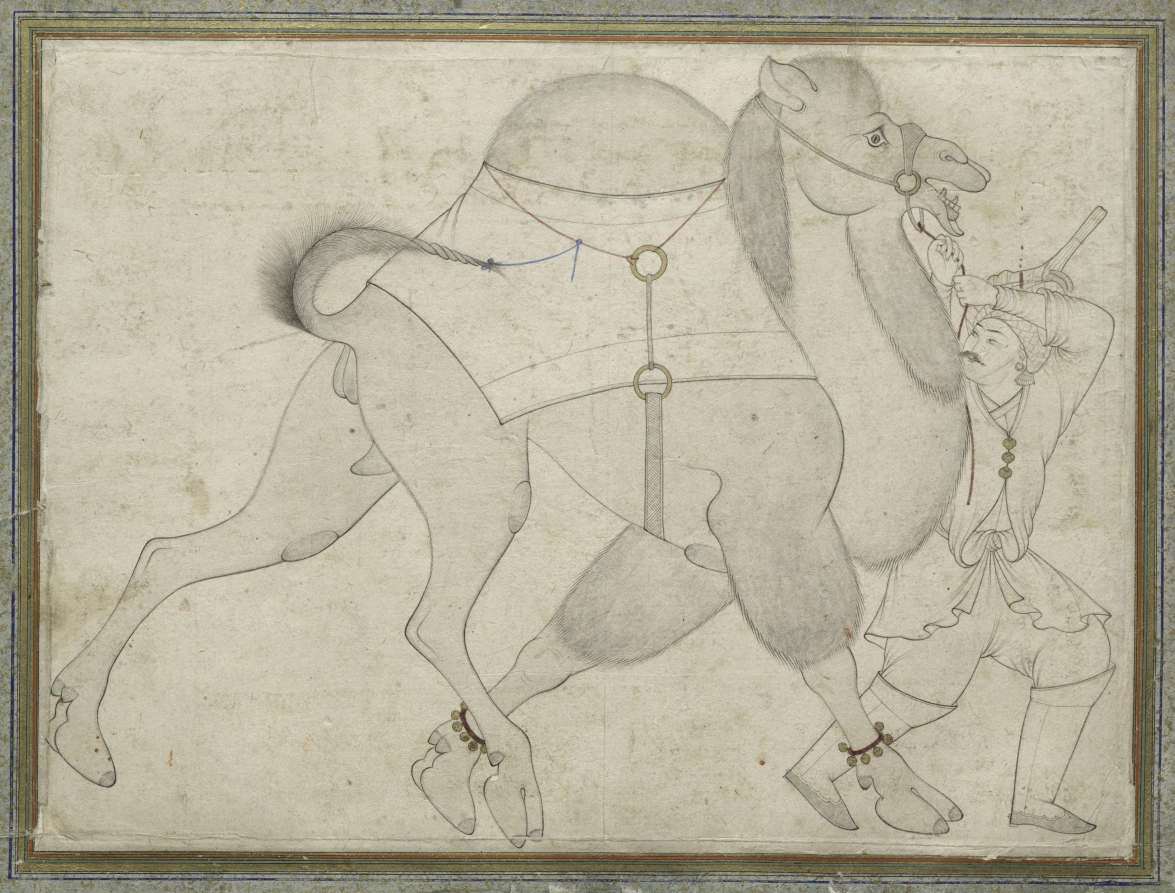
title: Camel and Groom; Single Page Illustration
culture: Iran, Qazvin, Safavid Period, 16th Century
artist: style of Shaykh Muhammad (Iranian)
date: c. 1545–1576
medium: ink, gold, and opaque watercolor on paper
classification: Drawing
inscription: script: none